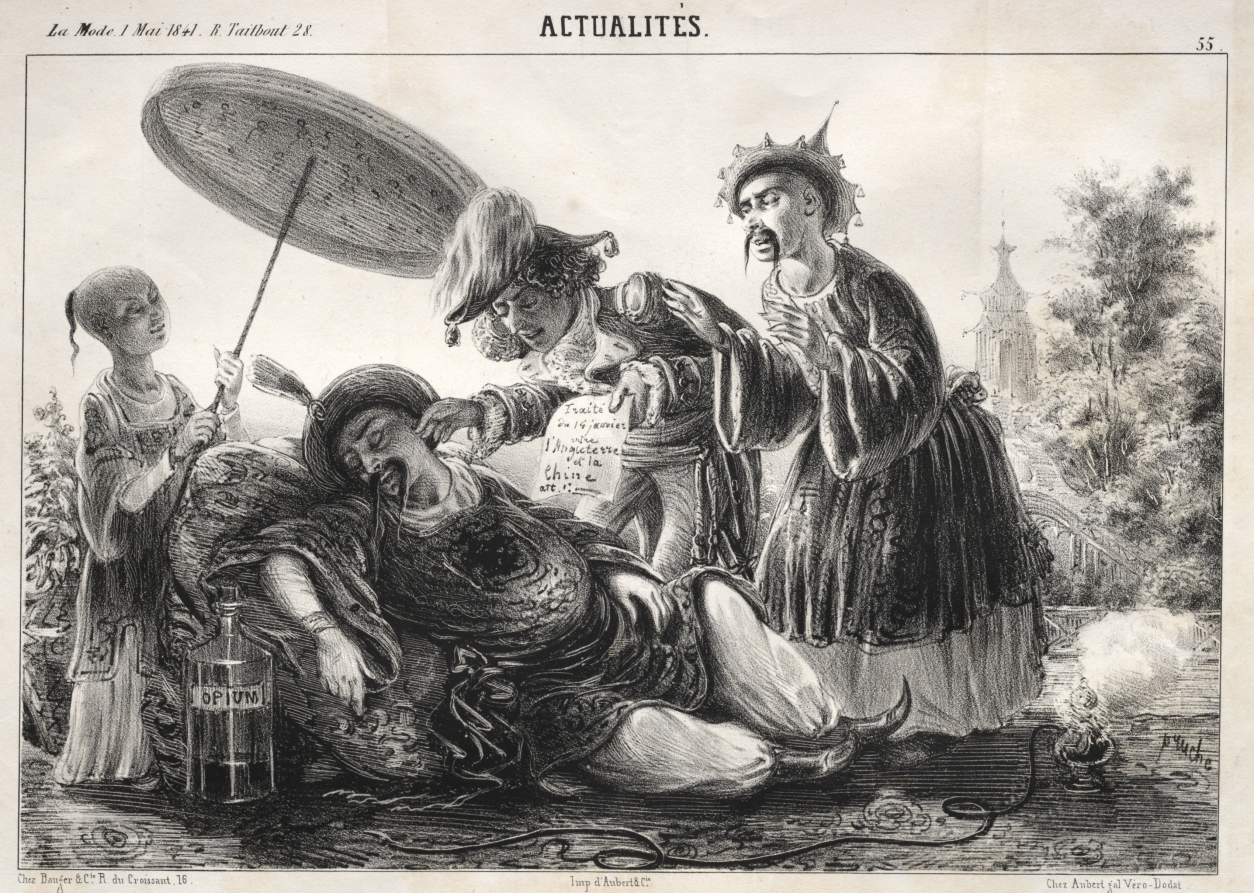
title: Actualités: --Dites donc! dites donc! celeste Empereur....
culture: France, 19th century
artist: Clémente Pruche (French, 1831–1870)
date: 1841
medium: lithograph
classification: Print